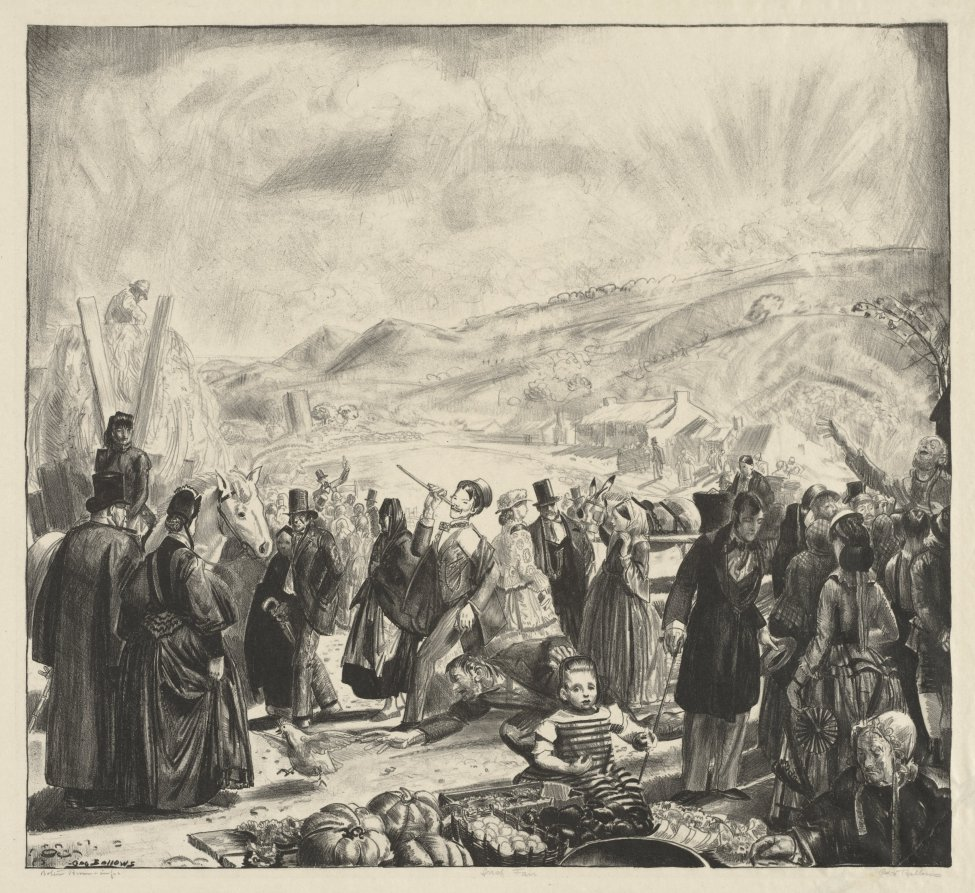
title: The Irish Fair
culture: America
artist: George Bellows (American, 1882–1925)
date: 1923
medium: lithograph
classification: Print